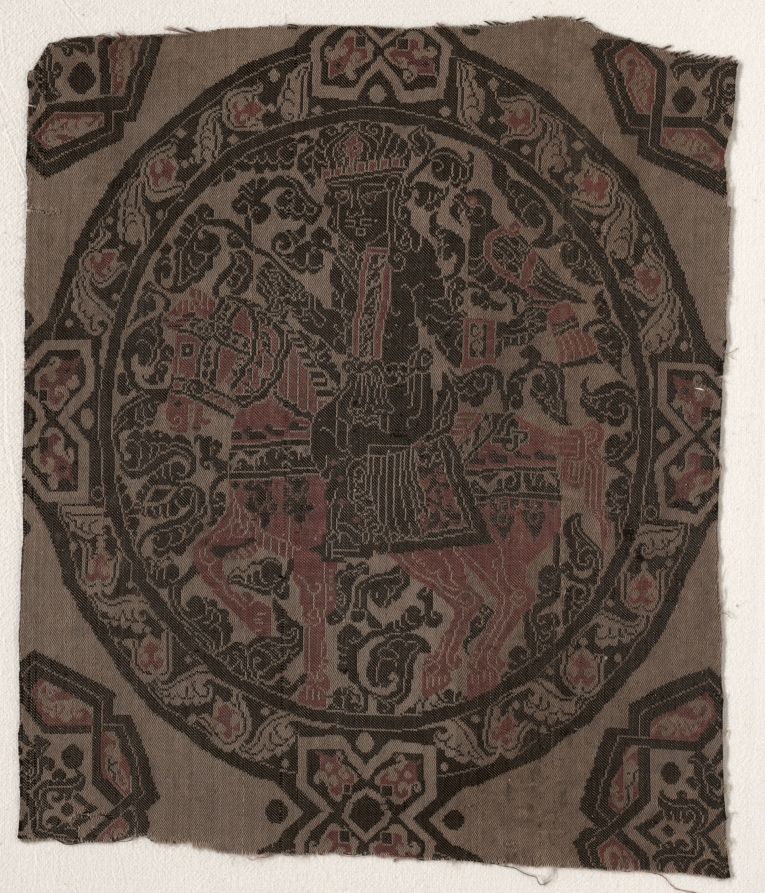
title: Fragment with Equestrian Falconer King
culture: Iran or Iraq, in the style of the Abbasid period (750–1258)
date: before 1982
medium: Silk: lampas weave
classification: Textile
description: This fragment preserves a roundel containing a king on horseback. He has a falcon in his left hand and a leafy branch in his right. The roundel’s border is ornamented with a scrolling foliate vine. Interspaces contain partial oval medallions enclosing an eight-pointed star within which is a four-directional palmette. Joining the roundels at their cardinal points are x-shaped geometric figures.